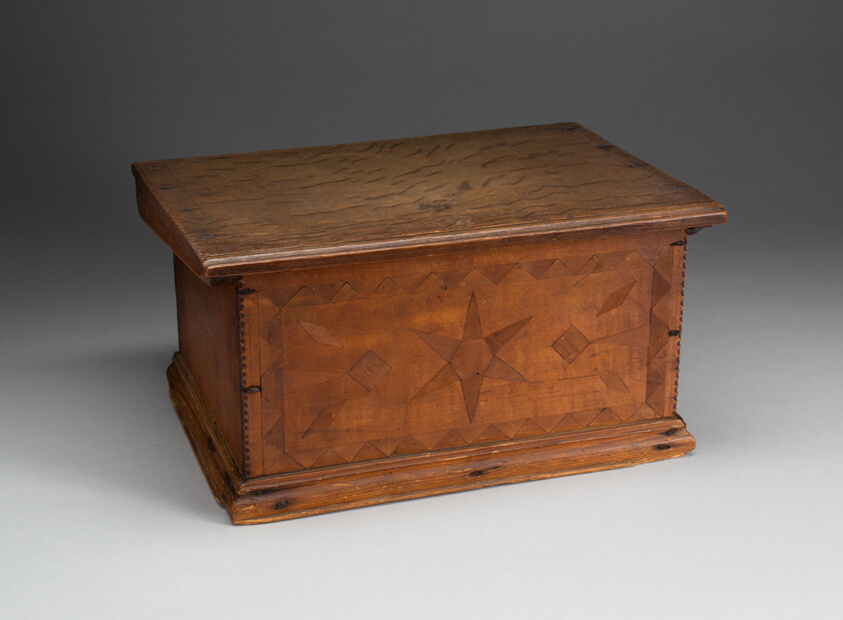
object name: Decorative Arts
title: Box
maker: America; Connecticut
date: 1670–1700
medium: Oak and maple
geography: Connecticut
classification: case furniture; box; furniture; american decorative arts; american arts; decorative arts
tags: furniture